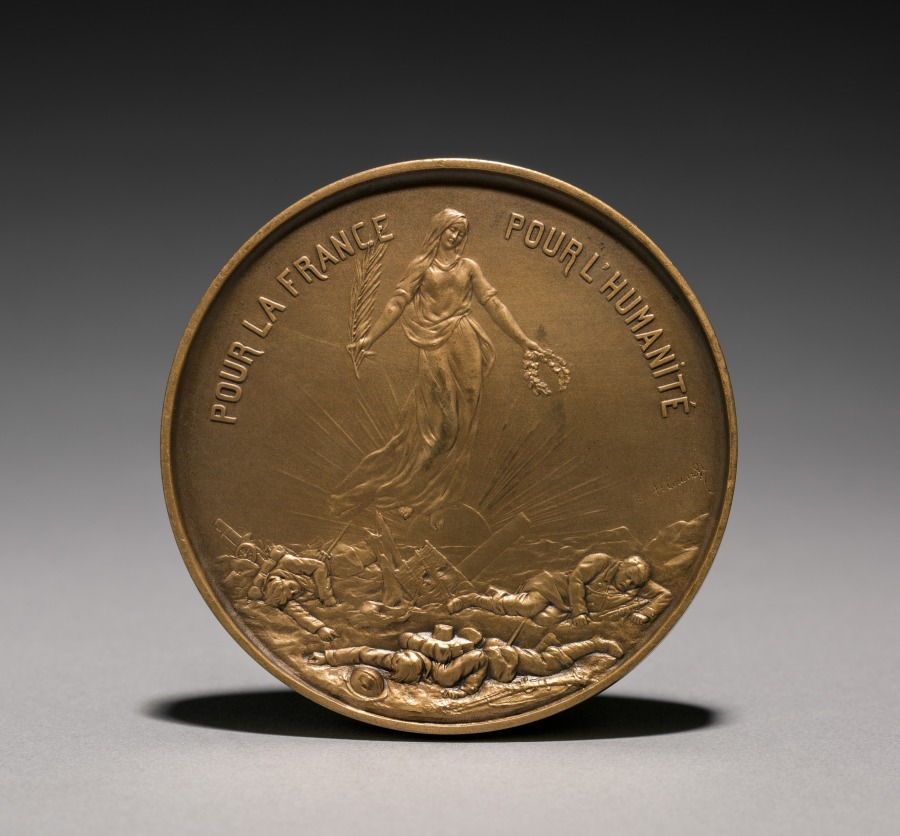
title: Medallion (obverse)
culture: France, 19th-20th century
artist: Henri Emile Allouard (French, 1844–1929)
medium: bronze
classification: Metalwork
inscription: "Aux héros inconnus. À la memoire de . . . pro patria."